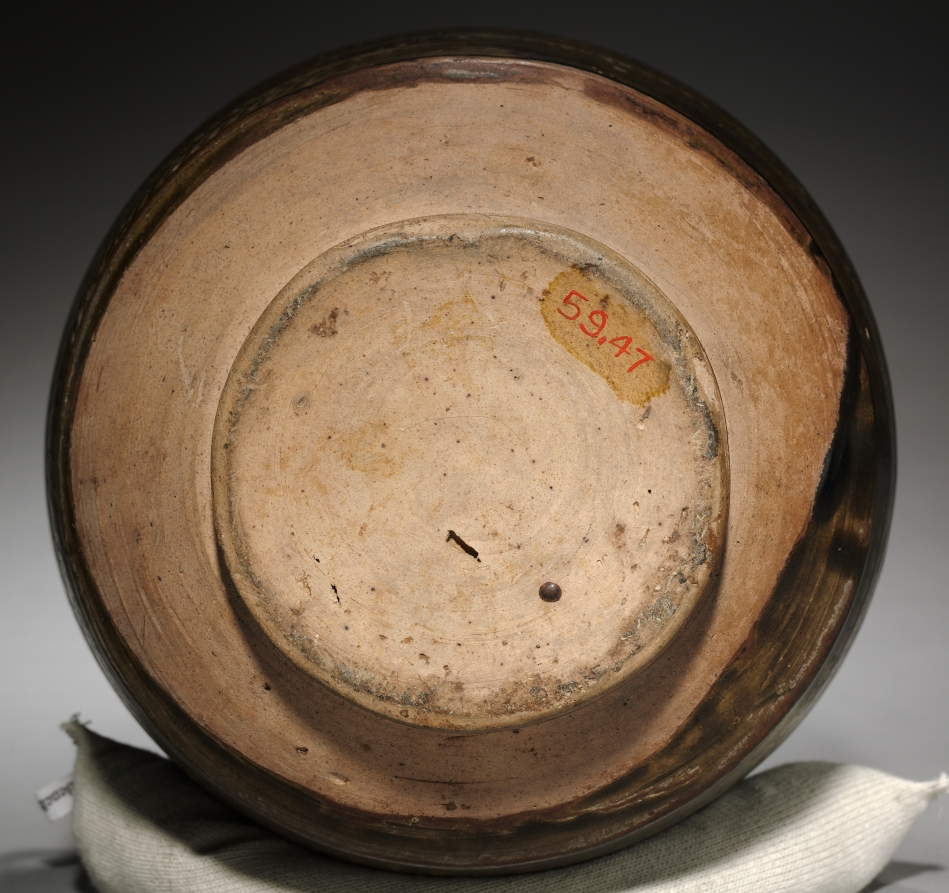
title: Jar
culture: China, Northern, Tang dynasty (618-907) - Five dynasties (907-960)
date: 800s–900s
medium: Glazed pinkish-buff stoneware; Brown ware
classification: Ceramic